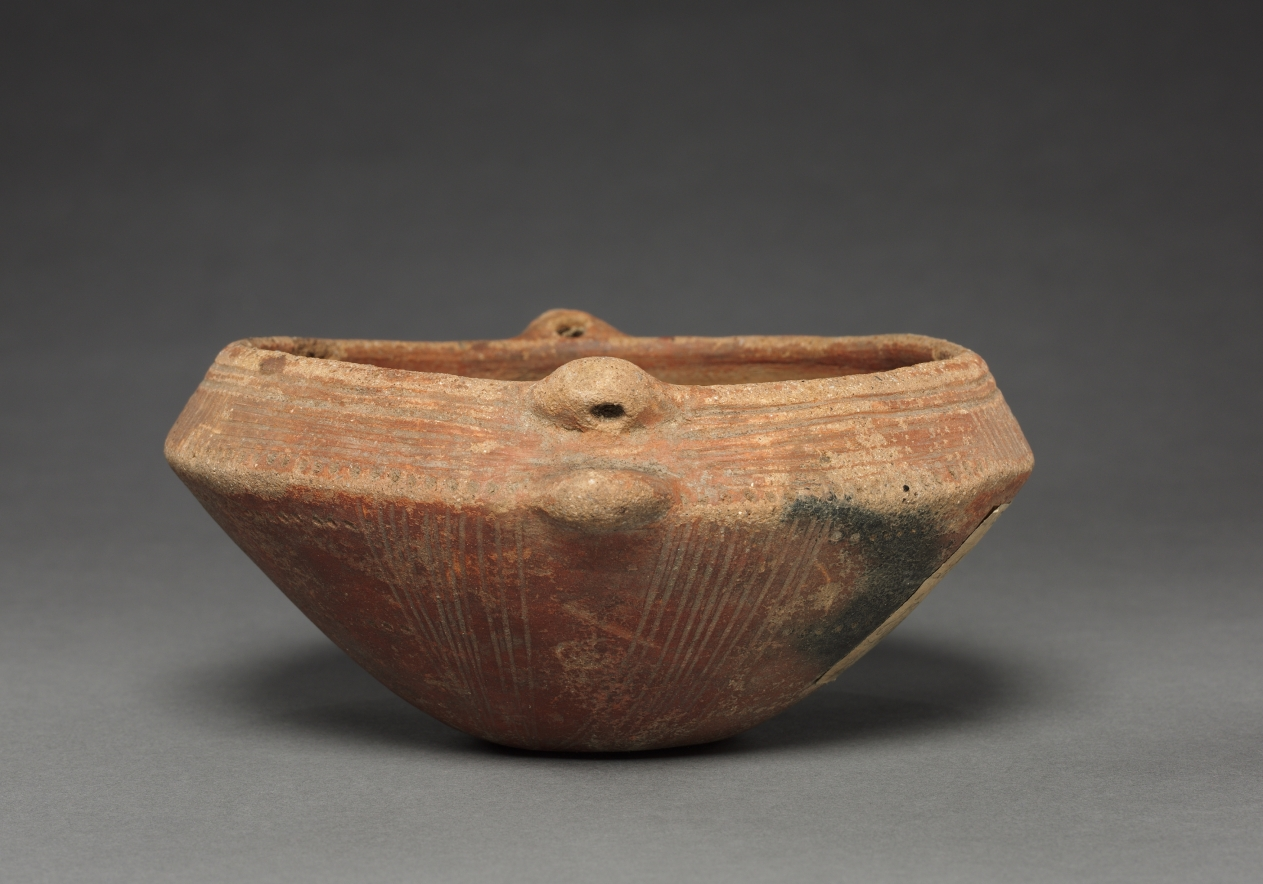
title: Jar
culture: Colombia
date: before 1550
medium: red ware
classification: Ceramic